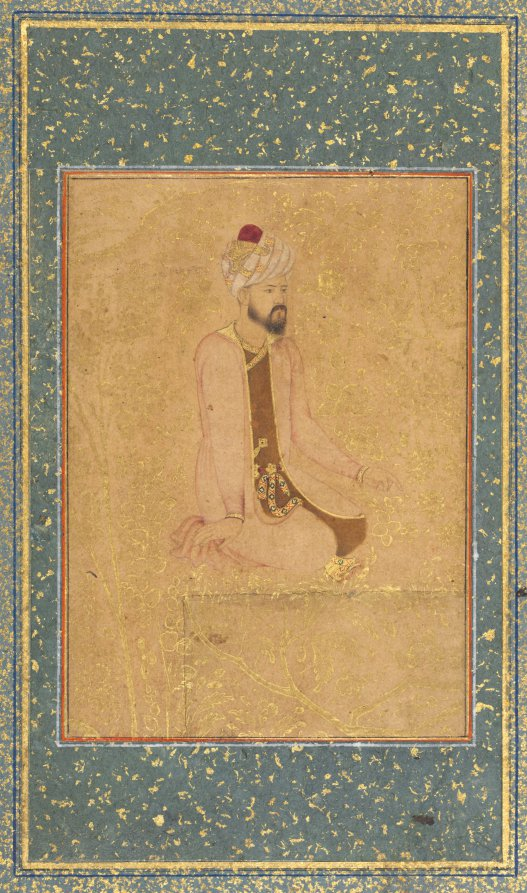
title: Seated Scholar, Border Fragment from the Teheran/Berlin album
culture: India, Mughal Dynasty (1526-1756)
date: c. 1605–1610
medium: color on paper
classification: Painting